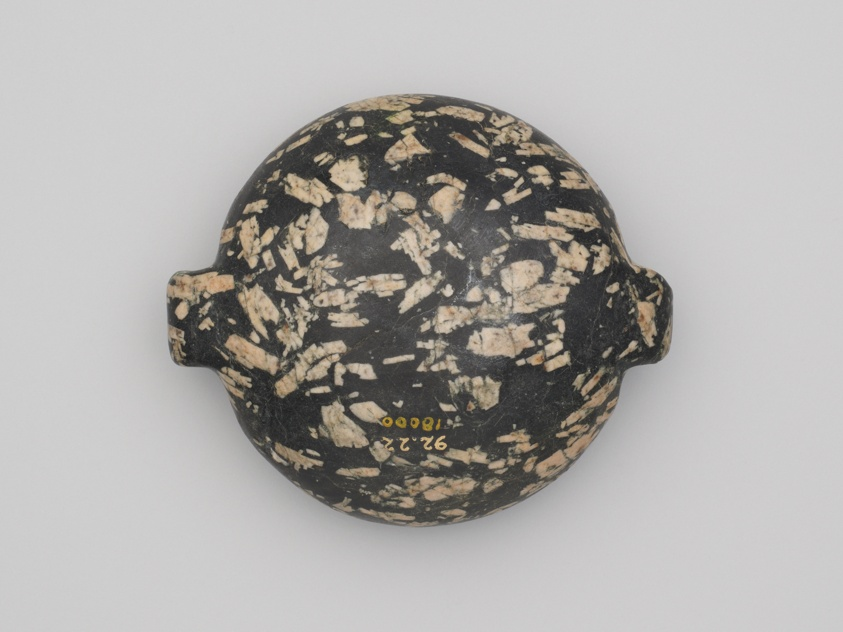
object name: Vessel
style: ancient, egyptian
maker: Egyptian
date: Predynastic Period, Late Naqada II (about 3300–3200 BCE)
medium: Andesite porphyry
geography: Egypt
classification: vessel; stone; ancient art